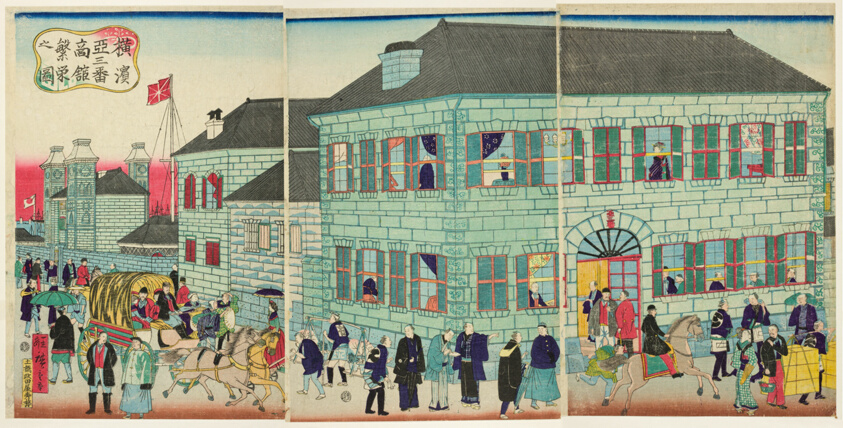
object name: Print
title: A Prosperous American Merchant Building in Yokohama (Yokohama asanban shokan hanei no zu)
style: Japanese (culture or style)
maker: Utagawa Hiroshige III (Japanese, 1842-1894)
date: 1871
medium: Color woodblock print; oban triptych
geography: Japan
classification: woodblock print; print; asian art